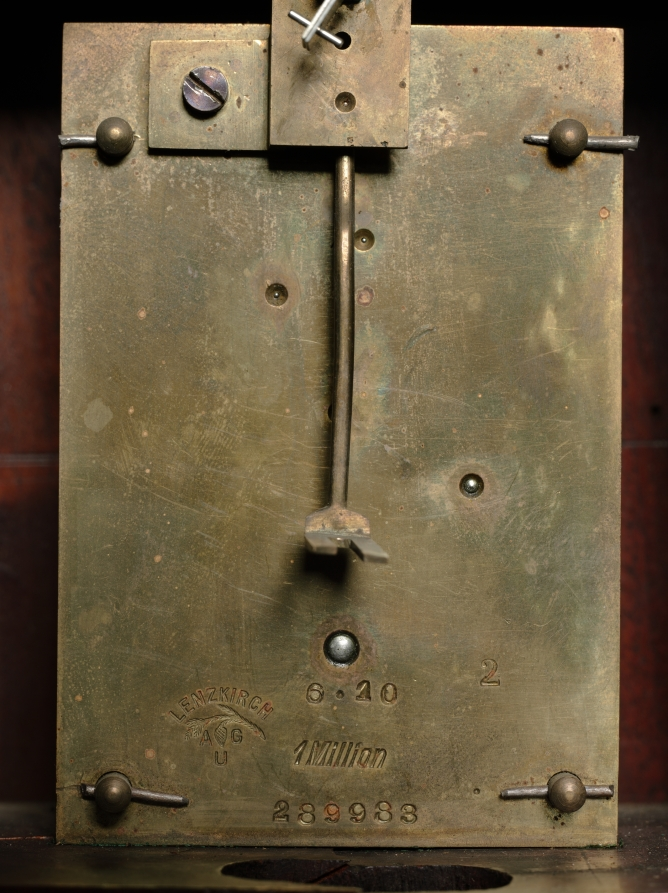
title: Mantle Clock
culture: America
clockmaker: Lenzkirch Clock Factory (German)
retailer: Tiffany & Co. (America, New York, est. 1837)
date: 1901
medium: brass, mahogany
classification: Wood